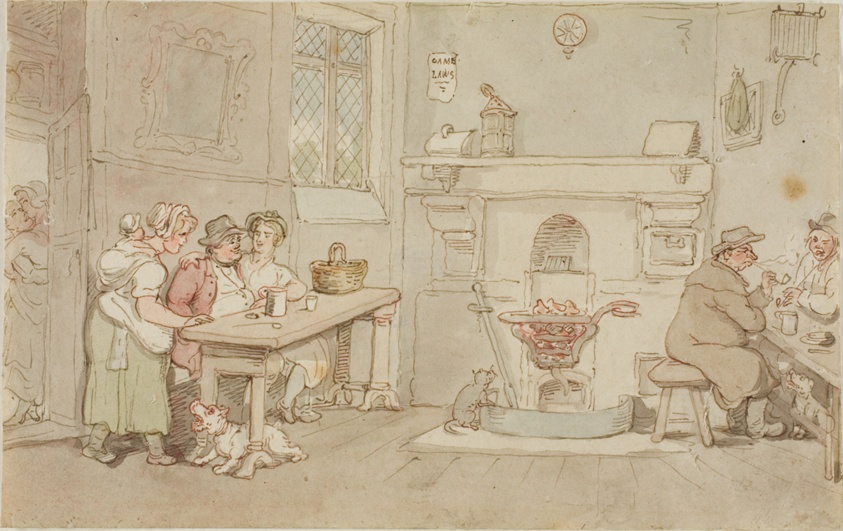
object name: Drawing and Watercolor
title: Ale House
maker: Thomas Rowlandson (English, 1756-1827)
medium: Pen and red and brown ink with brush and watercolor, on ivory wove paper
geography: England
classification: watercolor; drawings (visual works); prints and drawing